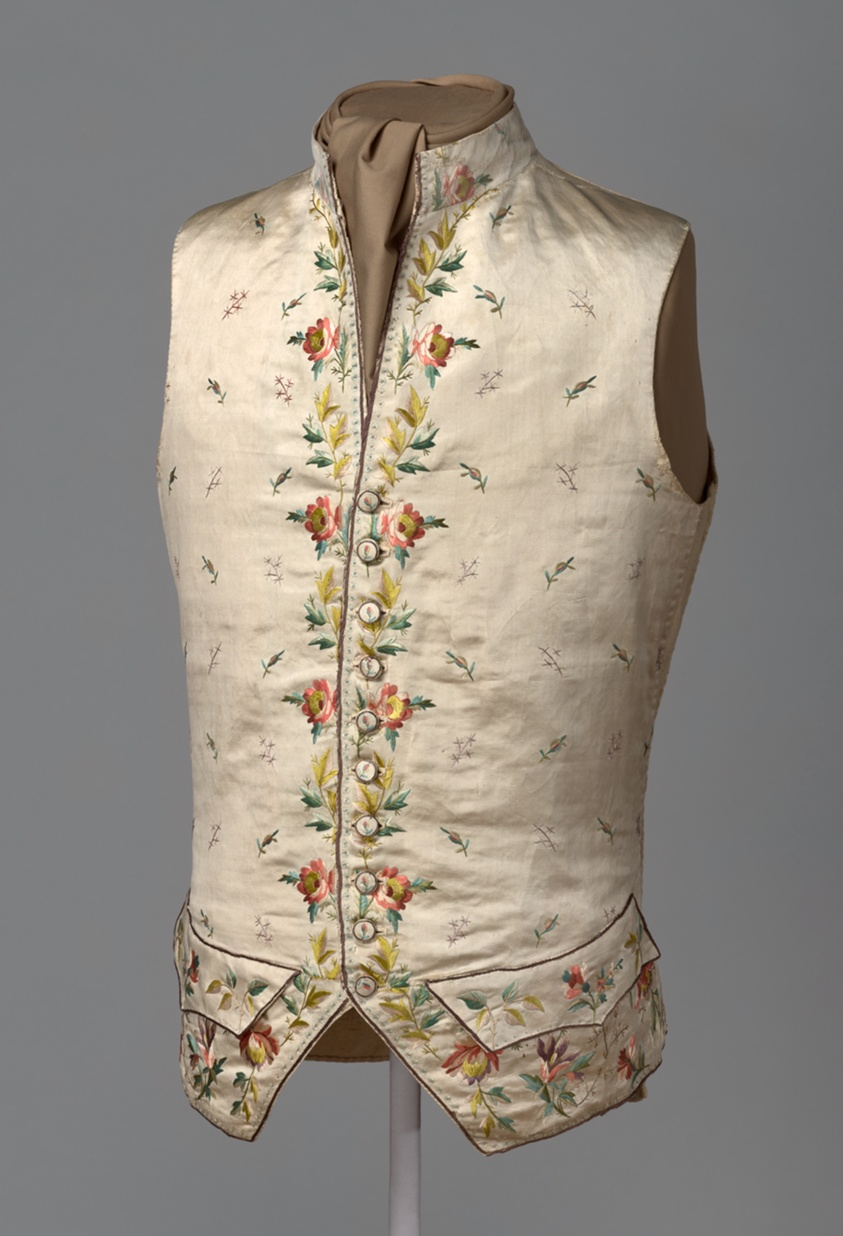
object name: Costume and Accessories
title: Man's Waistcoat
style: 18th Century, Rococo, Neoclassicism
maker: Possibly Lyon, France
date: Embroidered 1780s; altered 1795–1805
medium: Front: Silk, satin-weave foundation, embroidered with silk thread in satin, steam and buttonhole stitches and French knots; embroidered fabric covered buttons; silk, twill weave lining; back: linen, plain weave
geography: France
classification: waistcoat (garment); costume; needlework (visual works); dress (garment); clothing; textile; costume - embroidery; garment; costume - needlework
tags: flowers, roses, fashion, floral, floral motifs